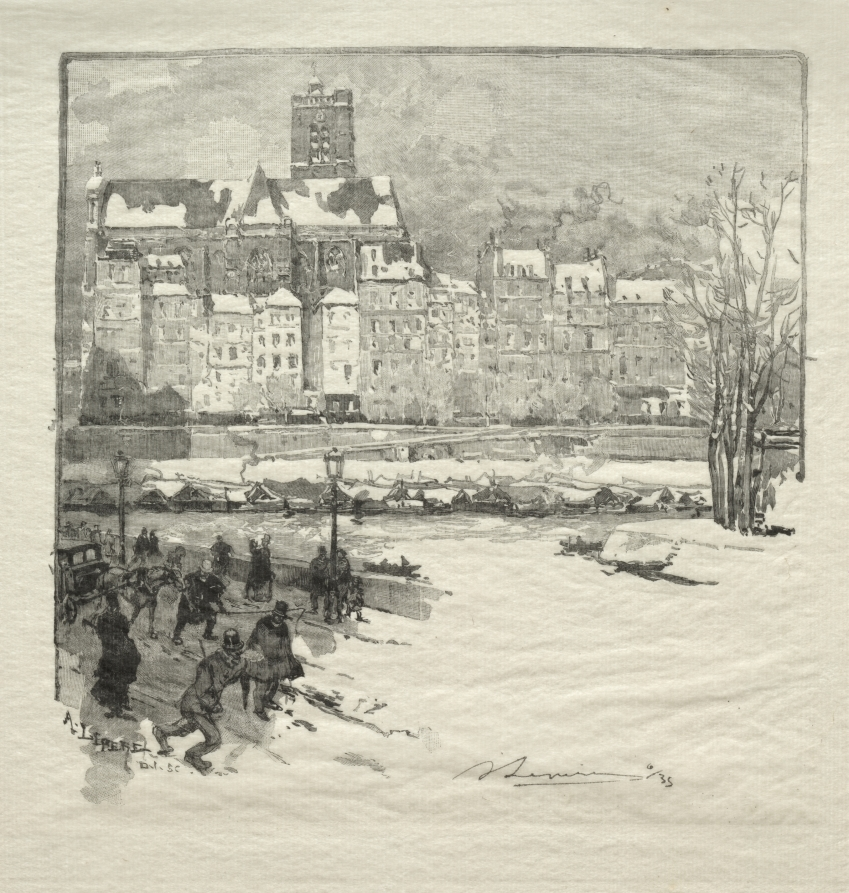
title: Quai de l'Hôtel de Ville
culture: France, 19th-20th century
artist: Auguste Louis Lepère (French, 1849–1918)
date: 1886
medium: wood engraving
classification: Print